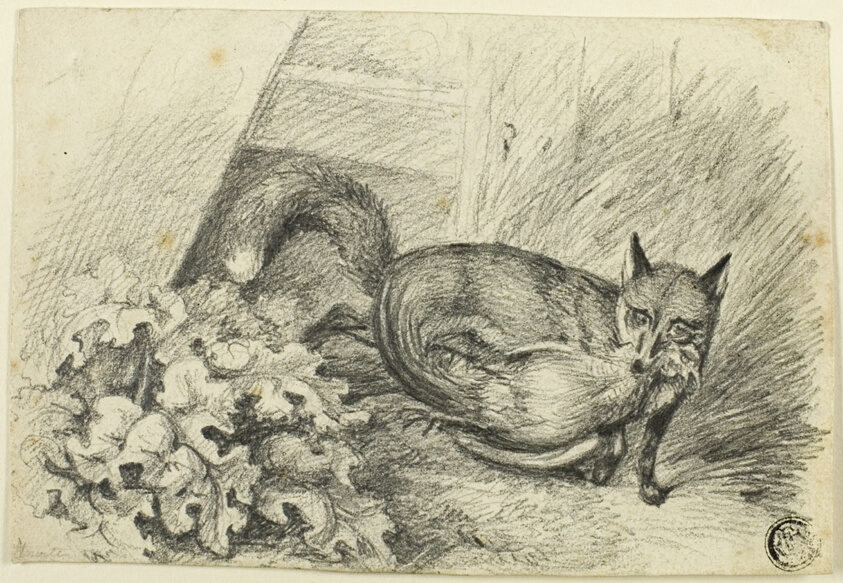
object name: Drawing and Watercolor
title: Fox Stealing a Cock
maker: Samuel Howett (English, c. 1756-1822)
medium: Graphite on ivory wove paper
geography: England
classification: graphite; drawings (visual works); prints and drawing